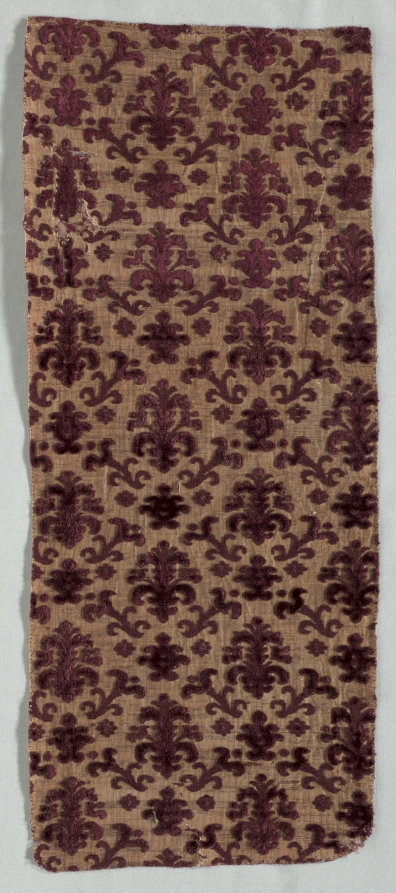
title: Velvet Fragment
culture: Italy, 1st third of 17th century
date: 1600–1640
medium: velvet (cut and uncut); silk and silver filé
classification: Velvet